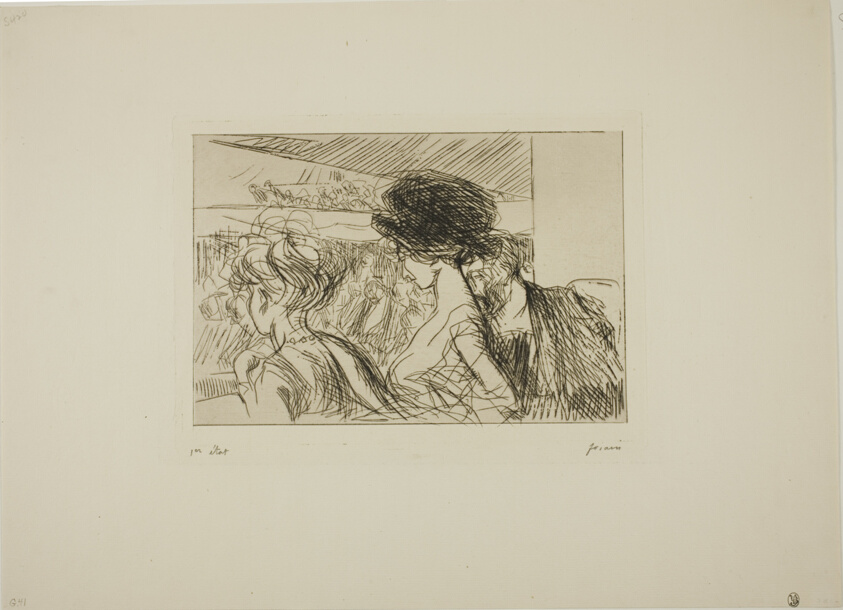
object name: Print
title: Lower Box at the Theater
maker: Jean Louis Forain (French, 1852-1931)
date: February 1909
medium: Etching on cream laid paper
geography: France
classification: etching; print; prints and drawing